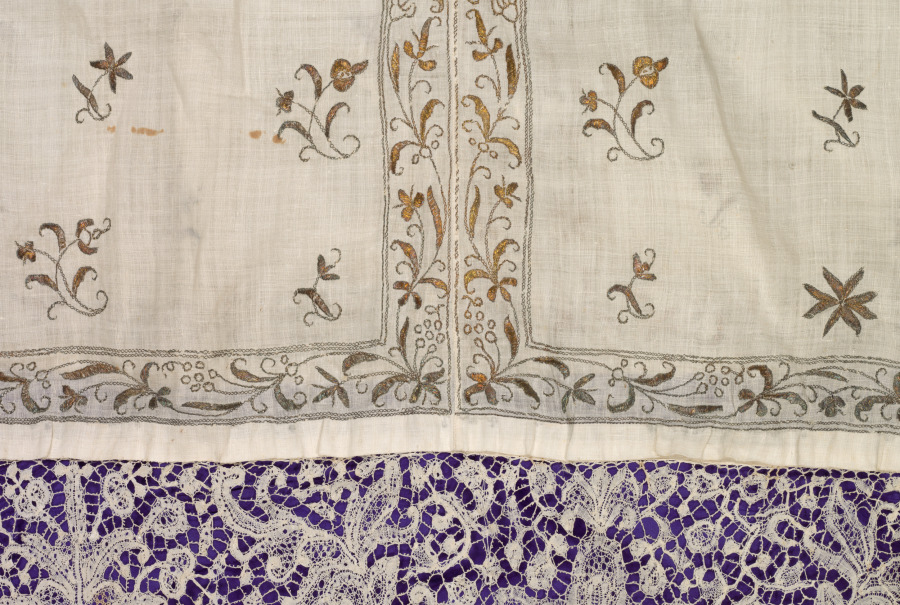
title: Alb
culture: Spain: embroidered linen; Flanders: bobbin lace (Point d’Angleterre) flounce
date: Embroidered Linen: 1600s; Bobbin Lace (Point d’Angleterre) Flounce: 1700s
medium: Plain weave linen embroidered in gold and silver; linen bobbin lace (Point d’Angleterre a Reseau)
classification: Garment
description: This beautiful vestment, called an alb, was worn under other liturgical garments by the clergy who served at the altar. Embroidered with gilt-metal thread flora on a linen ground, it is trimmed with a flounce and cuffs of lace, the most fashionable and expensive material at the time. Its purple silk lining indicates that it belonged to an archbishop. The exquisitely worked bobbin lace consists of two large composite floral designs flanked by popular curved forms on an elaborate bar ground that repeats ten times around the flounce.